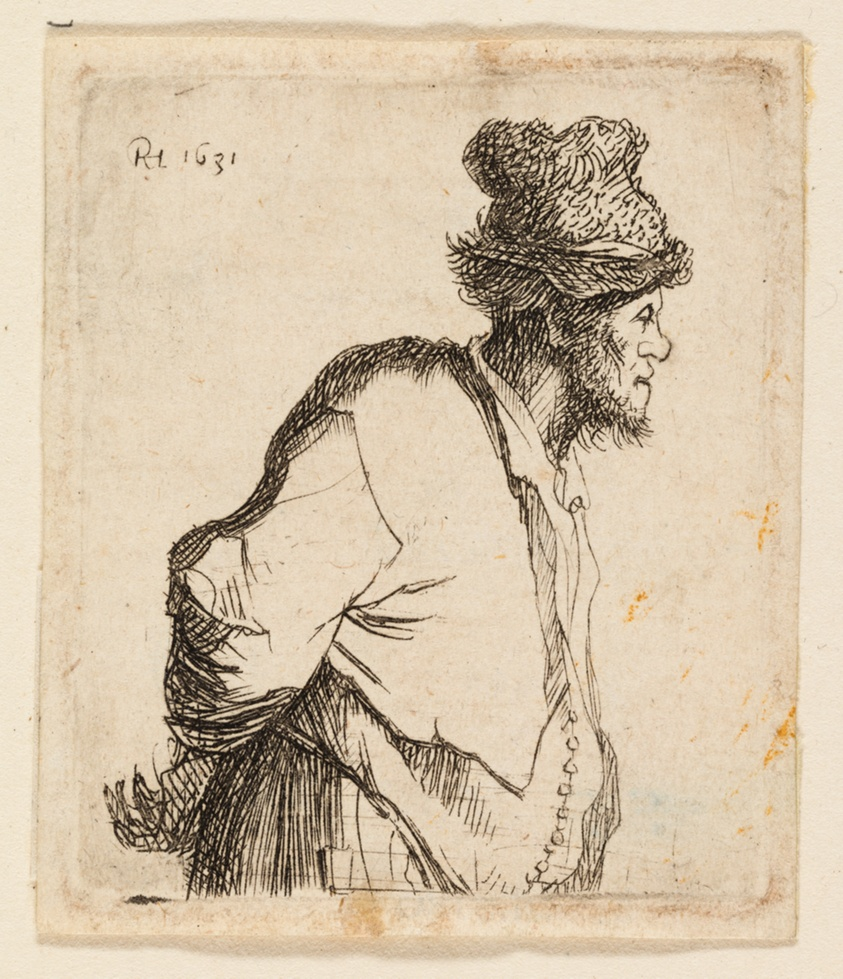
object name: Print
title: Peasant with His Hands Behind His Back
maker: Rembrandt van Rijn (Dutch, 1606-1669)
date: 1629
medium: Etching on ivory laid paper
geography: Holland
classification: etching; print; prints and drawing; paper